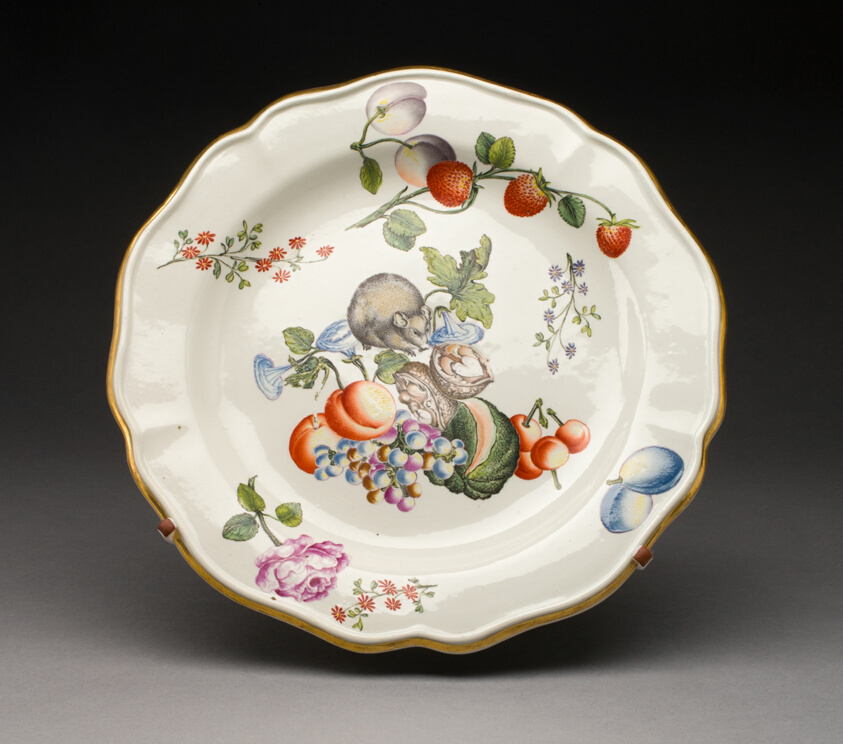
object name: Ceramics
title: Plate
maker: Du Paquier Porcelain Manufactory (Austria, 1718-1744)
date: c. 1735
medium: Hard-paste porcelain, polychrome enamels, and gilding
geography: Vienna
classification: plate (general, dish); tableware; dish (vessel); ceramics; porcelain; european decorative arts